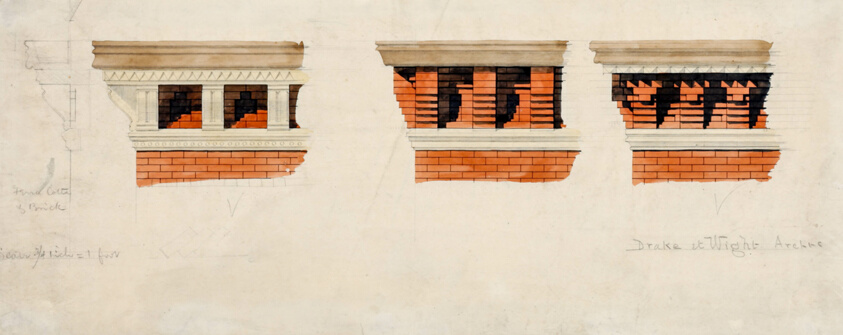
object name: Architectural Drawing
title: Cornice Studies, Chicago, Illinois, Design Drawing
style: 19th century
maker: Drake + Wight (American, 1873–1876)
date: c. 1873–1876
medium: Graphite, ink, and watercolor on paper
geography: Chicago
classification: architectural drawing; design drawing; architecture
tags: architecture, buildings, illinois, Chicago, drawing, design